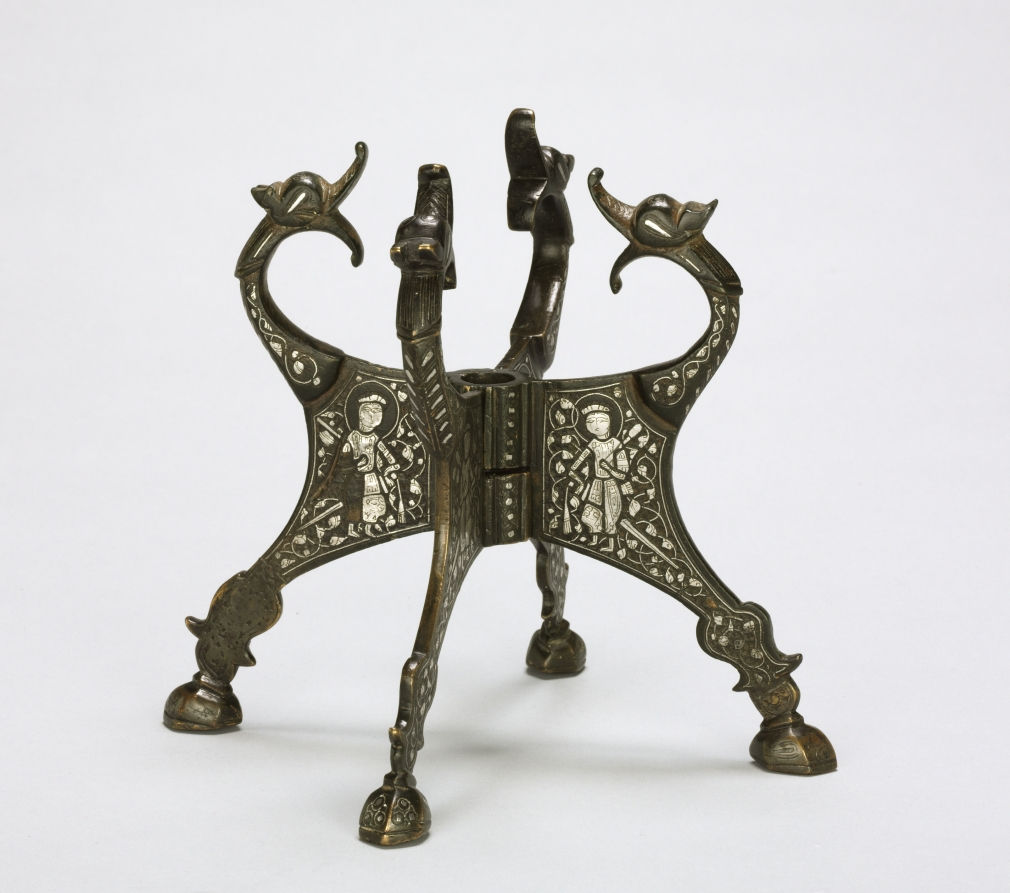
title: Dragon-headed Stand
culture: Northern Iraq or Syria, Zangid (1127–1251) or Ayyubid period (1171–1260)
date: 1200s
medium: cast brass inlaid with silver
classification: Metalwork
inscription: None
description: Themes of hunting and combat are evoked by this stand with gaping dragon heads and figures armed with swords and spears.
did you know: The four-legged stand has two interlocking parts.